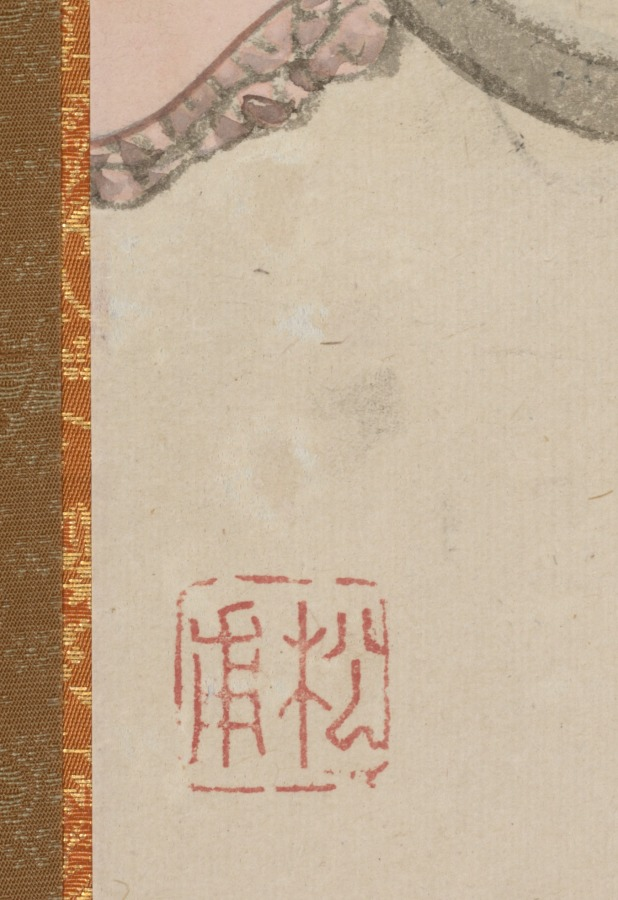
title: Genre Figures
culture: Japan, Edo period (1615–1868)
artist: Takebe Sōchō (Japanese, 1760–1814)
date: c. 1816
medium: hanging scroll; ink and color on paper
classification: Painting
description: Though rarely mentioned in official histories, Socho was an accomplished painter whose talent is readily apparent to the modern eye. For his compositions he chose traditional Japanese stories or everyday events. This painting belongs to a triptych (set of three) that was recently converted from folding screen panels to hanging scrolls.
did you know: The adult in this painting transports a small sculpted image of the fox deity Inari atop his head.